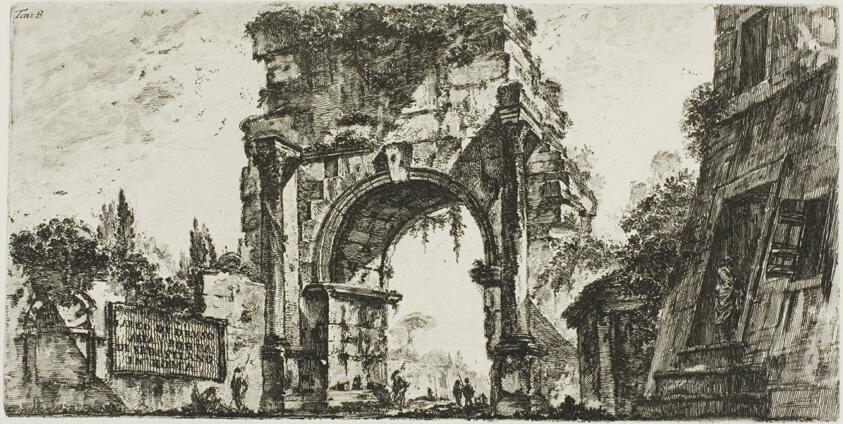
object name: Print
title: Arch of Drusus at the Porta S. Sebastiano in Rome, plate 8 from Some Views of Triumphal Arches and other monuments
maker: Giovanni Battista Piranesi (Italian, 1720-1778)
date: 1748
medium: Etching on ivory laid paper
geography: Italy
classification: etching; print; prints and drawing